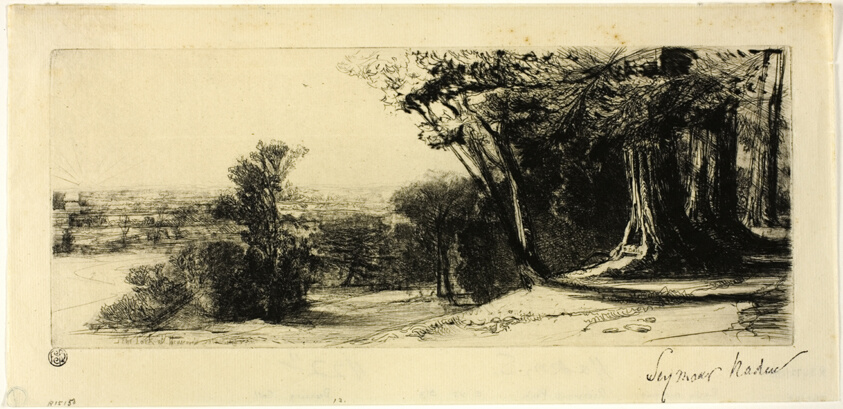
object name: Print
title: Early Morning, Richmond Park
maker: Francis Seymour Haden (English, 1818-1910)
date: 1859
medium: Etching and drypoint on ivory Japanese paper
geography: England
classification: etching; print; prints and drawing